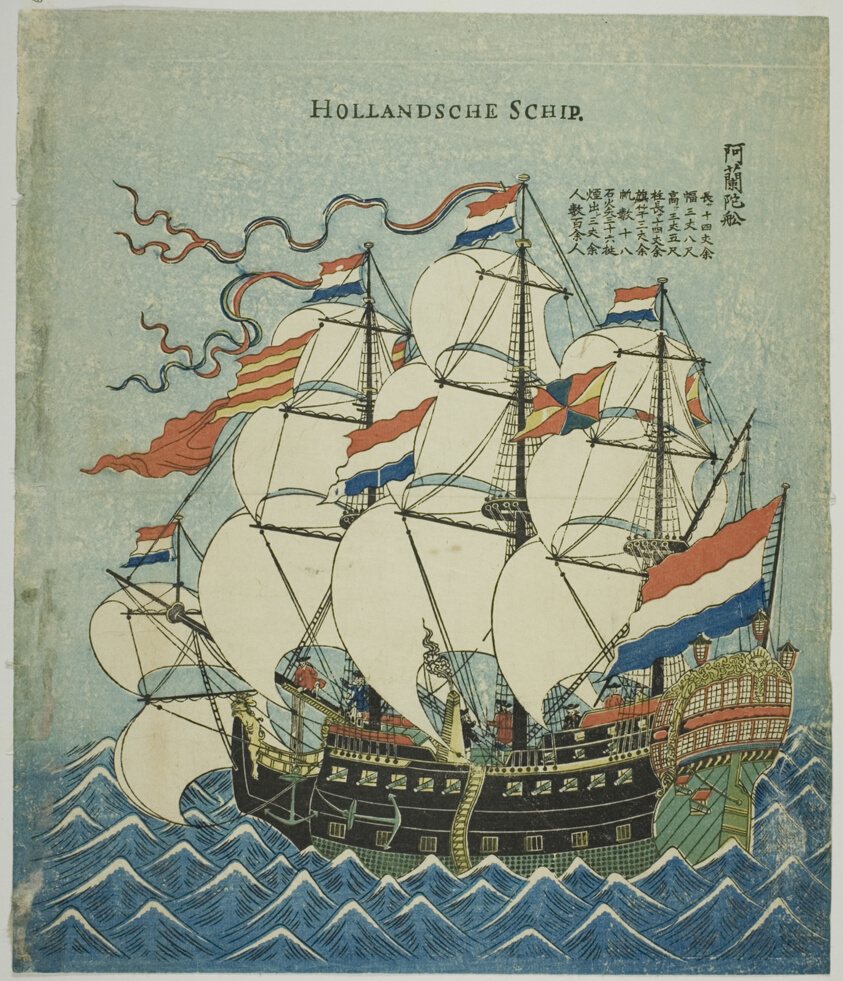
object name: Print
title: Dutch Ship (Hollandsche Schip)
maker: Unknown Artist (Japanese, active in late 18th century to mid 19th century)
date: 1780s-1850s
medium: Color woodblock print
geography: Japan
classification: woodblock print; print; asian art